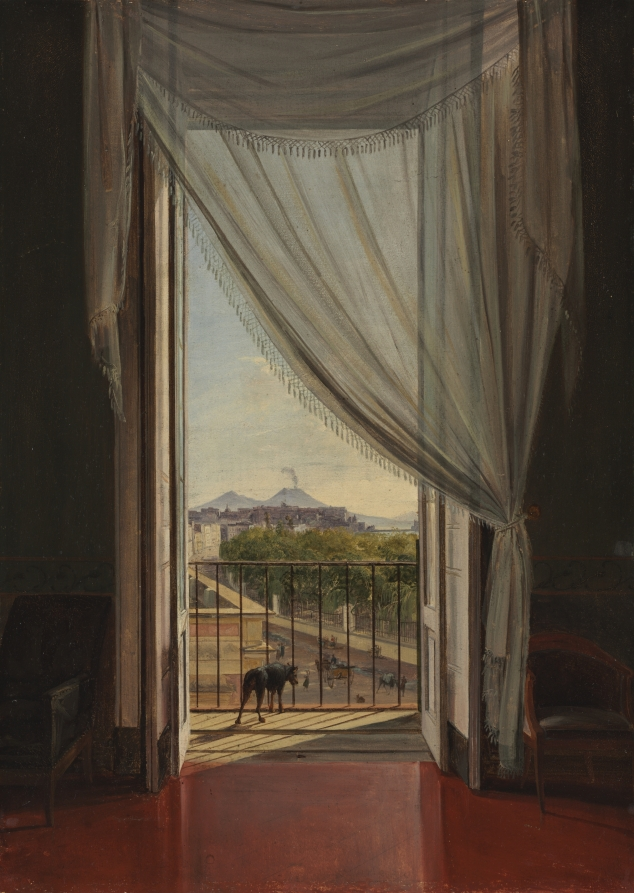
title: A View of Naples through a Window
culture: Germany, 19th century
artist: Franz Ludwig Catel (German, 1778–1856)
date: 1824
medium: oil on paper, mounted on canvas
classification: Painting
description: Franz Ludwig Catel worked in Rome and later traveled south to Naples. This painting presents that city’s most distinctive attraction: Mount Vesuvius, an active volcano that appears against an otherwise calm sky. Catel portrayed the scene from within a hotel room, contrasting the potentially overwhelming force of nature with the illusion of protection offered by distance and enclosed space.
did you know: Mount Vesuvius was almost continuously active at the time that Franz Ludwig Catel visited Naples, and erupted just two years before this painting was completed.